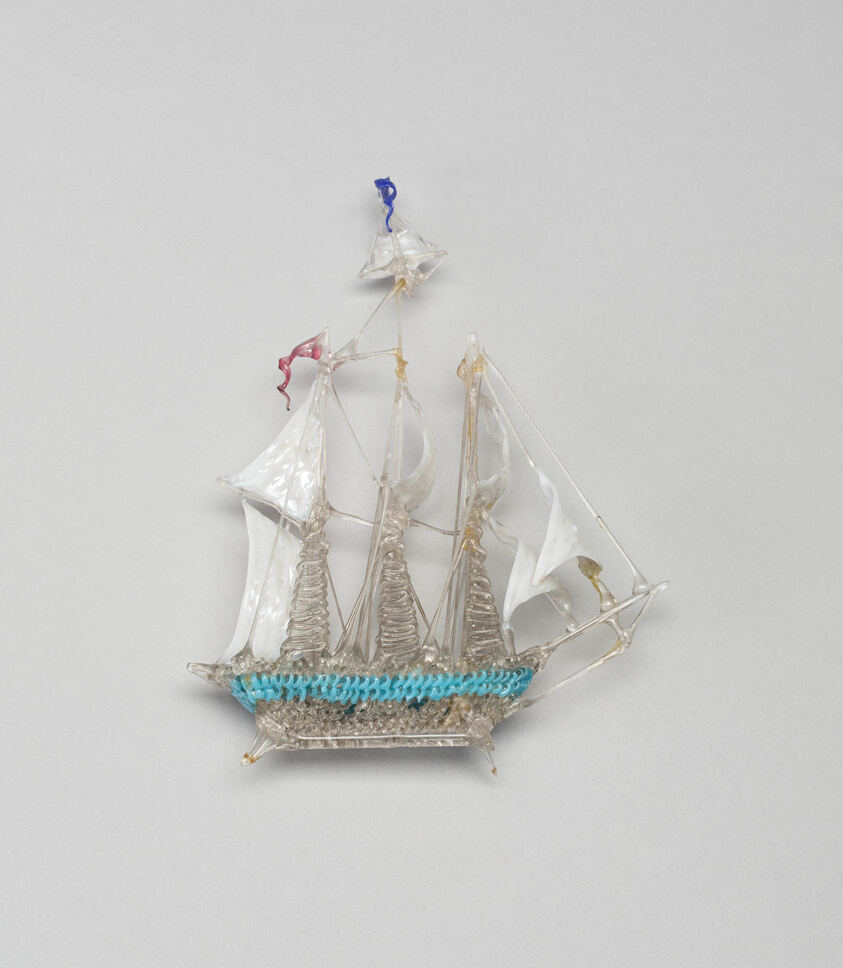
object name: Glass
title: Sailboat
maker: Nevers, France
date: 18th century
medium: Glass; lampwork (verre de Nevers), metal armature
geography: France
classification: glass; miniature; decorative object/ornament; european decorative arts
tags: boats, agriculture, lamps